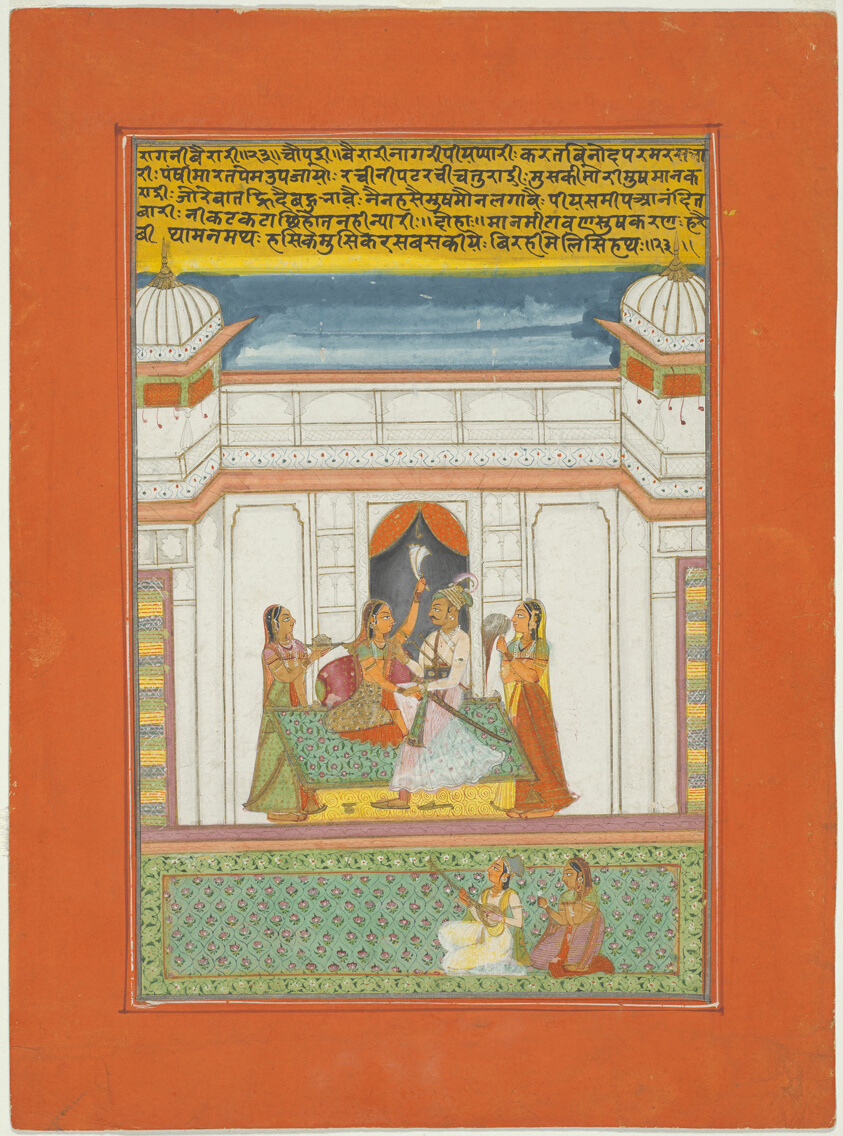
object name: Painting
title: Ragini Bairari, Page from a Jaipur Ragamala Set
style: South Asian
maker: India; Rajasthan, Jaipur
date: c. 1750-1770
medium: Opaque watercolor and gold on paper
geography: Rajasthan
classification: miniature painting; painting; asian art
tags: music, musicians